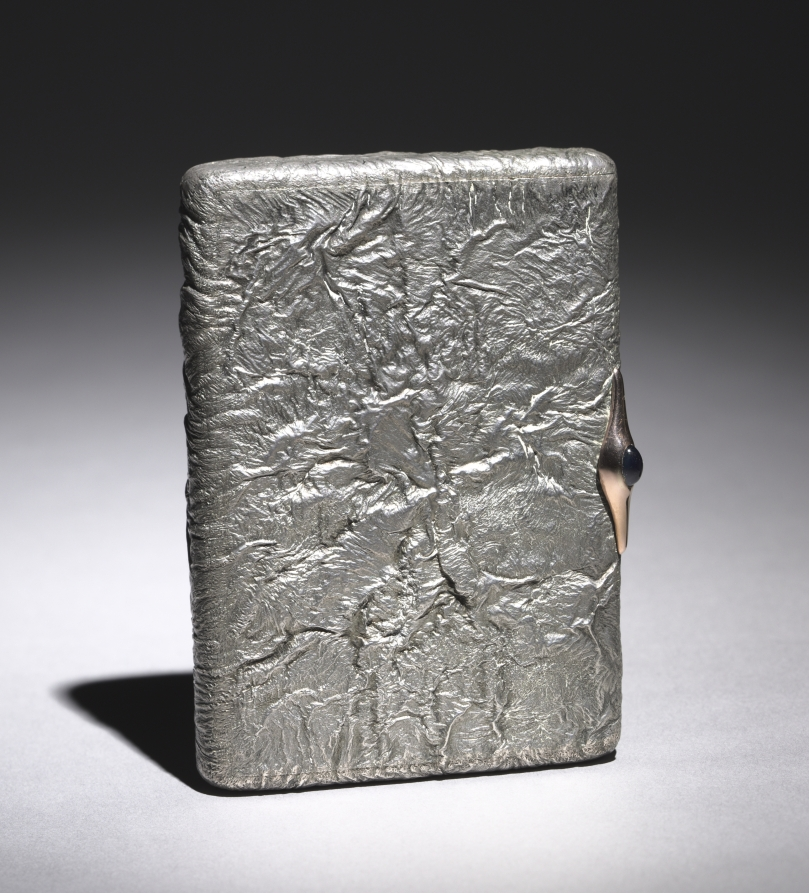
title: Cigarette Case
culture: Russia, St. Petersburg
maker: House of Fabergé (Russian, 1842–1918)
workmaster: Alexander Karpov (Russian)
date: c. 1900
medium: silver, cabochon sapphire mounted in gold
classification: Miscellaneous